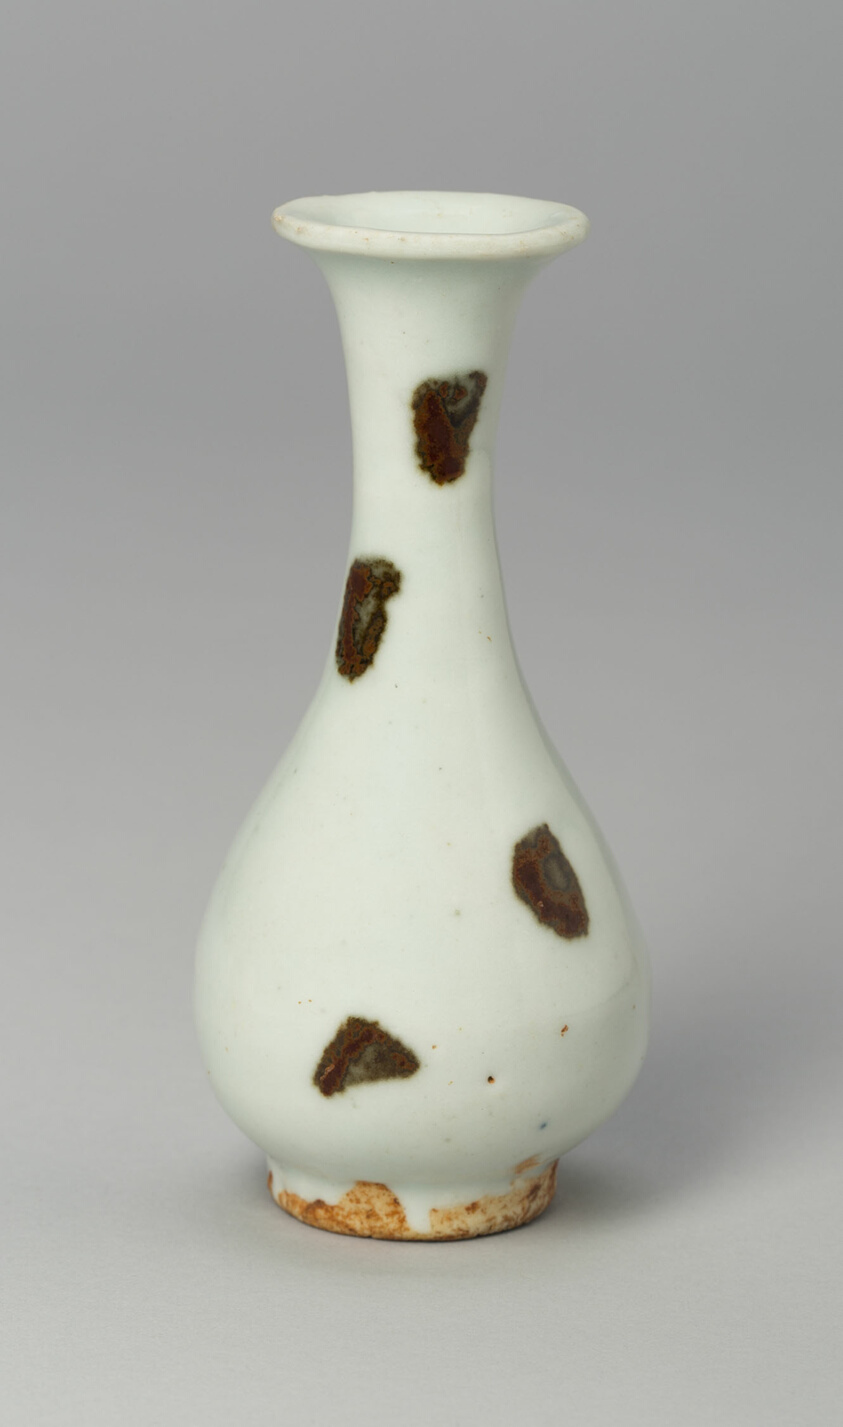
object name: Vessel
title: Small Bottle Vase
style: Chinese (culture or style)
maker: China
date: Yuan dynasty (1271–1368), first half of the 14th century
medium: Qingbai ware; glazed porcelain in iron spots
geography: China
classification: vase; vessel; ceramics